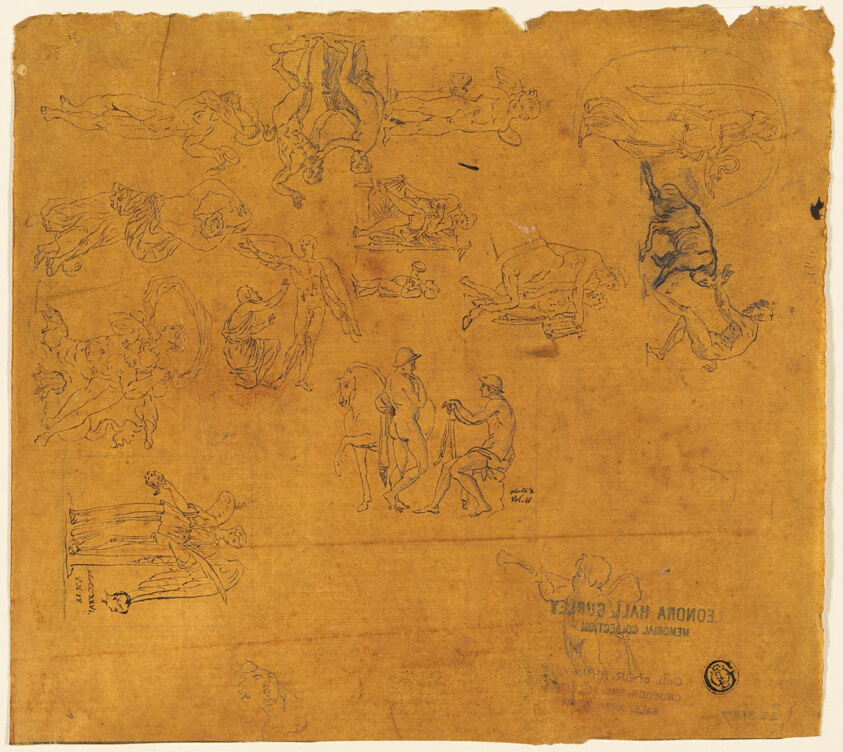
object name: Drawing and Watercolor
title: Sheet of Sketches of Mythological Subjects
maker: Attributed to Thomas Stothard (English, 1755-1834); or possibly George Cumberland (English, 1760-1848)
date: 1700-1799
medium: Pen and brown ink with graphite on tan tinted laid paper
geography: England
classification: pen and ink drawings; drawings (visual works); prints and drawing